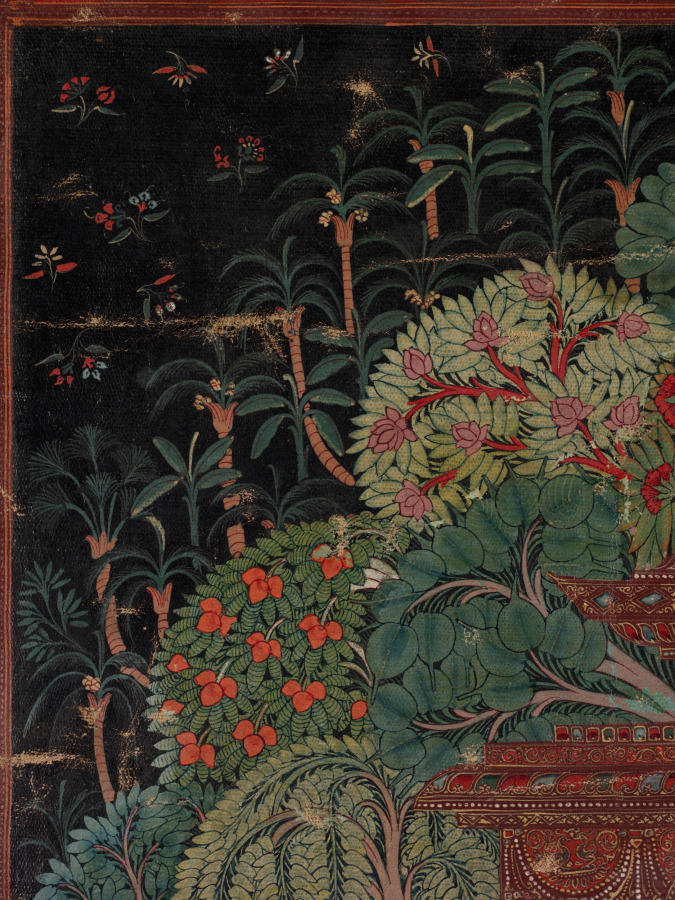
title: Green Tara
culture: Central Tibet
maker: attributed to Aniko (Nepalese, active in Tibet mid- to late 1200s)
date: c. 1260s; mounted, 2020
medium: thangka; gum tempera, ink, and gold on sized cotton; mount: silk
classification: Painting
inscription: Om Ah Hum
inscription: om tare tutare ture svaha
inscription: Om Ah Hum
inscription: Om Ah Hum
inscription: om ah sarva vyida svaha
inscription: ye dharmā hetuprabhavā he- tuṃ teṣāṃ tathāgato hy avadat teṣāṃ ca yo nirodha evaṃvādī mahāśramaṇaḥ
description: For Tibetans, Green Tara is one of the preeminent figures of their Buddhist faith, a radiant savioress who embodies the female form of the perfect, enlightened mind. The Green Tara in the Cleveland thangka—a Tibetan devotional painting on cloth—specifically dispels fear and provides protection, just like her mantra inscribed on the back side of the painting. Her green color and fear-not gesture link her to the cosmic Buddha of the North, enshrined above her head. Most scholars agree that this work was painted by the celebrated Nepalese artist known as Aniko.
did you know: The tiny monastic figure under Green Tara's right hand commissioned the painting.